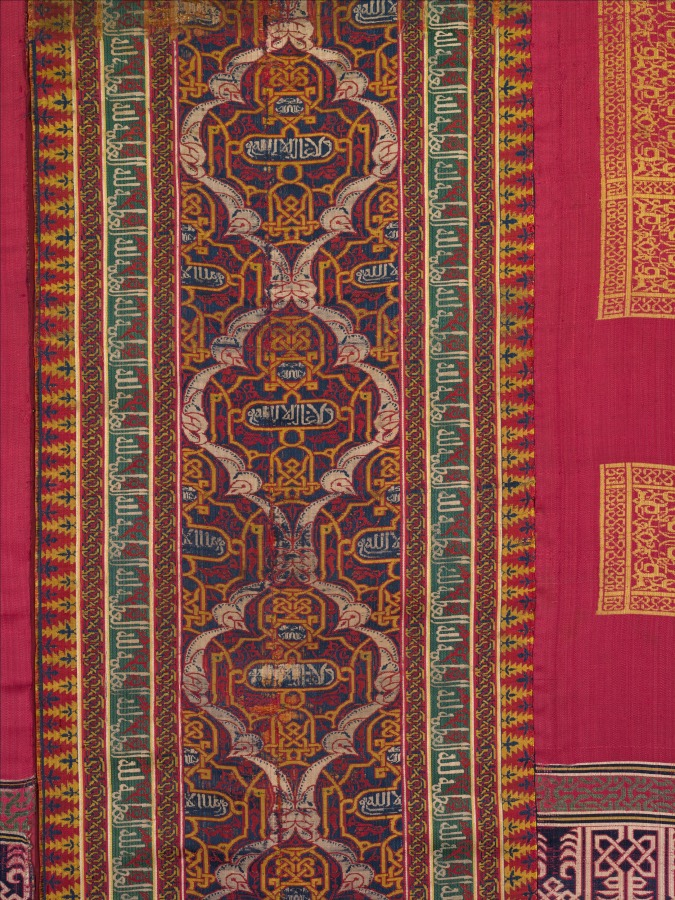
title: Silk curtain from the Alhambra palace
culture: Spain, Granada, Nasrid period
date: 1300s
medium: lampas and taqueté: silk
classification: Textile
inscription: the bold knotted Kufic inscription in the top and bottom borders of the side panels repeats the Arabic word "felicity." Within the arches forming a frieze in the top border is a Kufic inscription "good fortune" and a Naskhi inscription repeating trhe motto of the Nasrid dynasty, "There is no conqueror but God." In the borders of the three large ornamental rectangles on each side panel is the Naskhi inscription "Dominion belongs to God alone." On the central panel the inscriptions in the borders repeat the phrase, "Majestry is God's," while the Nasrid motto, "There is no conqueror but God" and, above, "Blessing," are inscribed in the arabesque ogives.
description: This is one of two of the largest, most complete, and most ornate curtains to survive from the 1300s when it presumably hung in the royal Alhambra Palace in Granada, the last Muslim stronghold in Spain. Its style, artistic vocabulary, and harmonious proportions reflect the magnificent wall decoration in the Alhambra. The motto of the ruling Nasrid dynasty, "There is no conqueror but God," is inscribed in the end borders and central panel. The inscribed striped silk forming the central panel is more worn, suggesting that it was recycled, most likely during the 1300s.